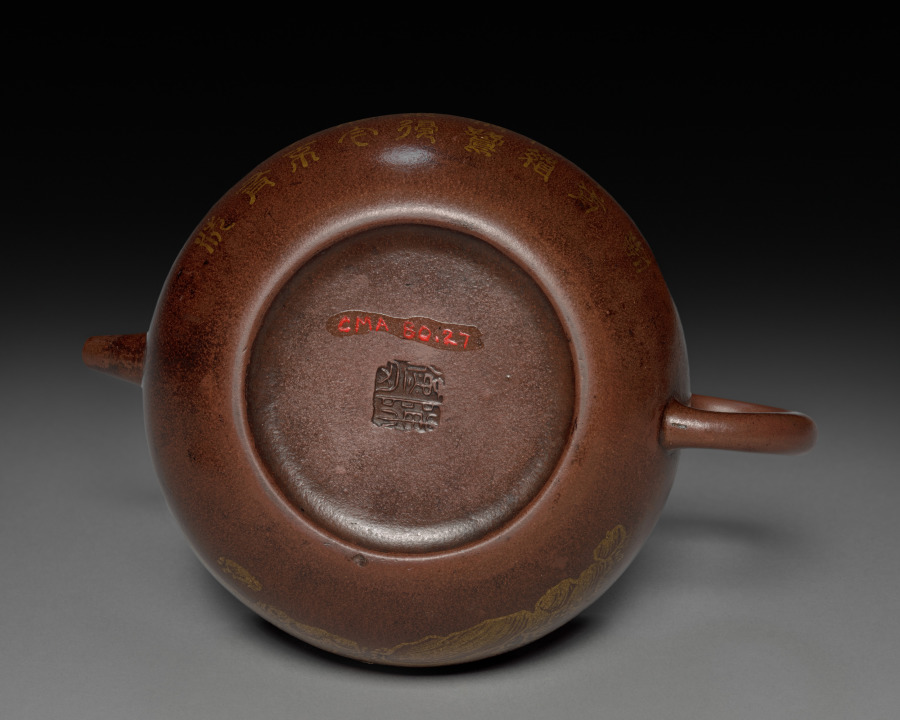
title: Teapot with Landscape and Imperial Poem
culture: China, Jiangsu province, Yixing, Qing dynasty (1644–1911), Qianlong reign (1736–95)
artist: Chen Hanwen (Chinese, active c. 1720s–90s)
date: 1762–95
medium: Stoneware, with gold pigment, Yixing ware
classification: Ceramic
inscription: 陳漢文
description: This teapot with a polished surface shows an imperial poem in gold on one side and a landscape on the other. The poem in archaic seal script was composed by the Qianlong emperor on his third southern inspection tour in 1762, when he traveled to southern China to solidify his rule. The base bears a stamped seal of its maker. Yixing potters produced teapots primarily for Ming dynasty literati-officials who valued simplicity and restraint, until the early Qing emperors introduced them at court.